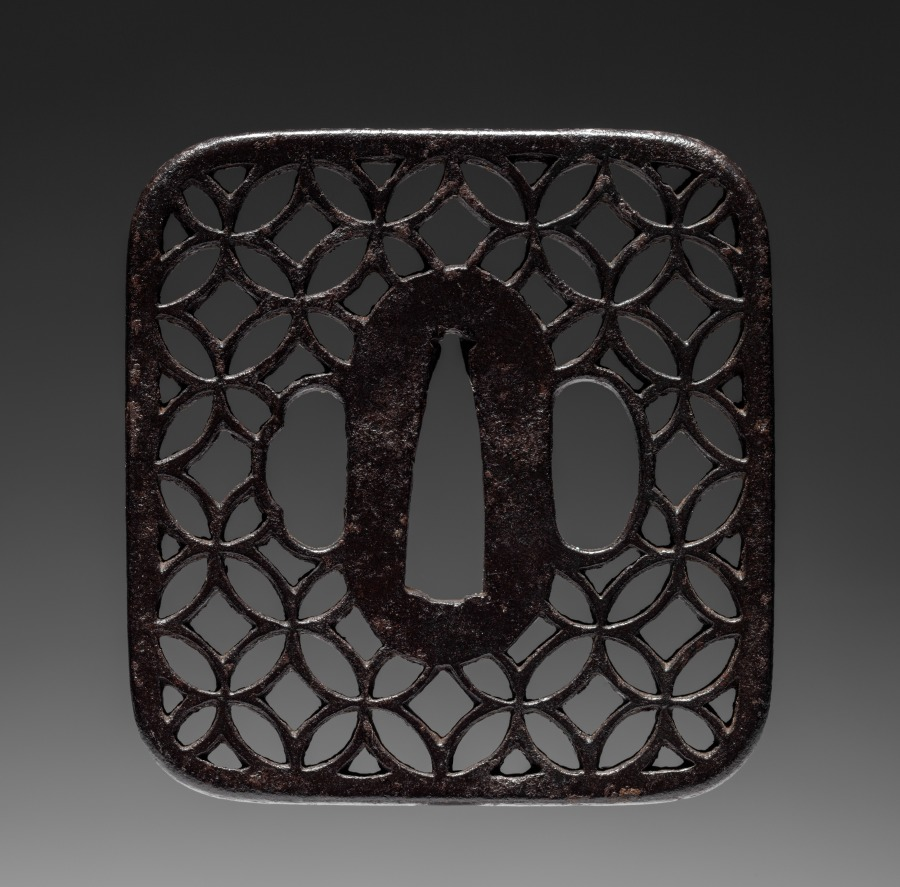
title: Sword Guard (Tsuba)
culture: Japan, possibly Edo period (1615-1868)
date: c. 1615–1868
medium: iron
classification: Arms and Armor